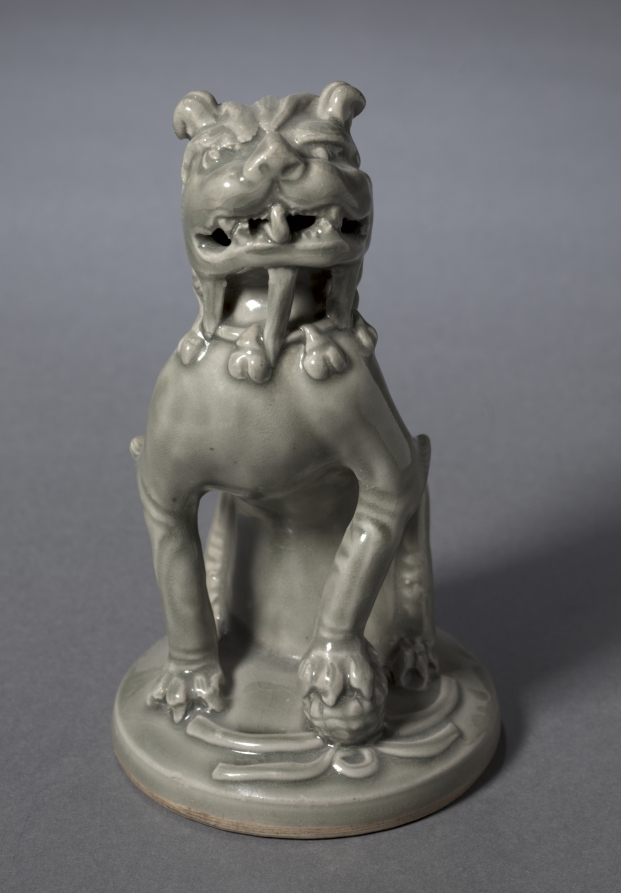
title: Incense Burner Top in the Shape of a Lion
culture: China, Shaanxi province, Northern Song dynasty (960-1127)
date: 1100s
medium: green-glazed porcelaneous stoneware, Yaozhou ware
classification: Ceramic